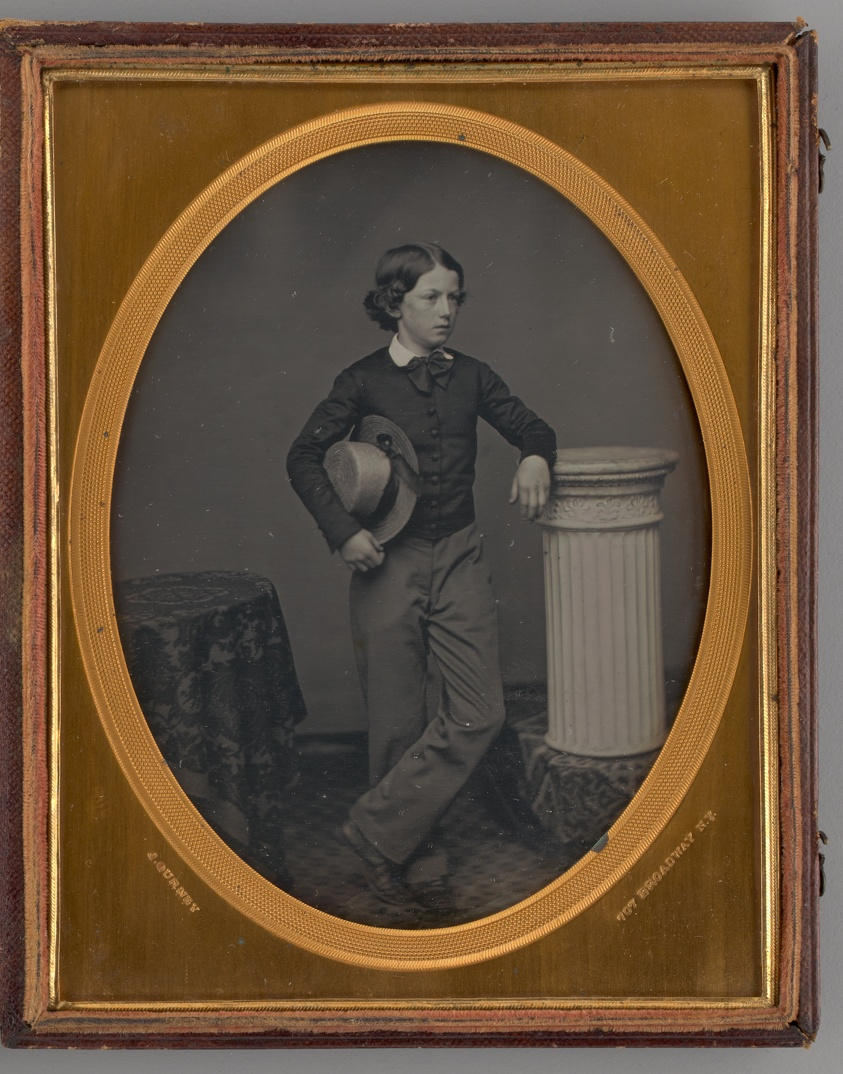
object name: Photograph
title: Untitled (Portrait of Standing Boy)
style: 19th century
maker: Jeremiah Gurney; American, 1812-1895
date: 1857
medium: Daguerreotype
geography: United States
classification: portrait; photograph; photographic process; photography; portrait; daguerreotype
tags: lundberg collection, portraits, portraits: male subject, Male